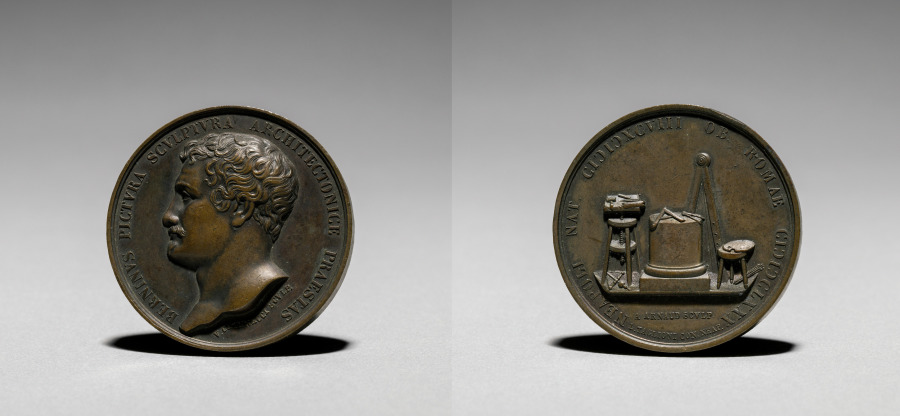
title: Medal Depicting Gian Lorenzo Bernini (1598-1680) from the Illustrious Men of the Kingdom of the Two Sicilies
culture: 20th century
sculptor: V. Catenacci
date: 1830–34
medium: bronze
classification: Metalwork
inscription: On the obverse: BERNINVS PICTVRA SCVLPTVRA ACHITECTO. NICE PRAESTAS Bust of Bernini facing left. Below: V. CATENACCI SCVLP. On the reverse: NEAPOLI NAT. CICICXCVIII OB. ROMAE CICICCLXXX Trestle with tools for sculptor column with tools for architect and stool with palette and brushes, at the bottom easel. Below: A. ARNAUD SCVLP. L. TAGLIONI CON. NEAP.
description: Gian Lorenzo Bernini was an Italian sculptor, urban planner, architect, painter, set designer, and playwright during the Renaissance. He designed many churches, monuments, and the canopy over the high altar at St. Peter's Basilica in Rome.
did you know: Naples was a center of medal and coinage minting for several centuries in the Kingdom of the Two Sicilies.